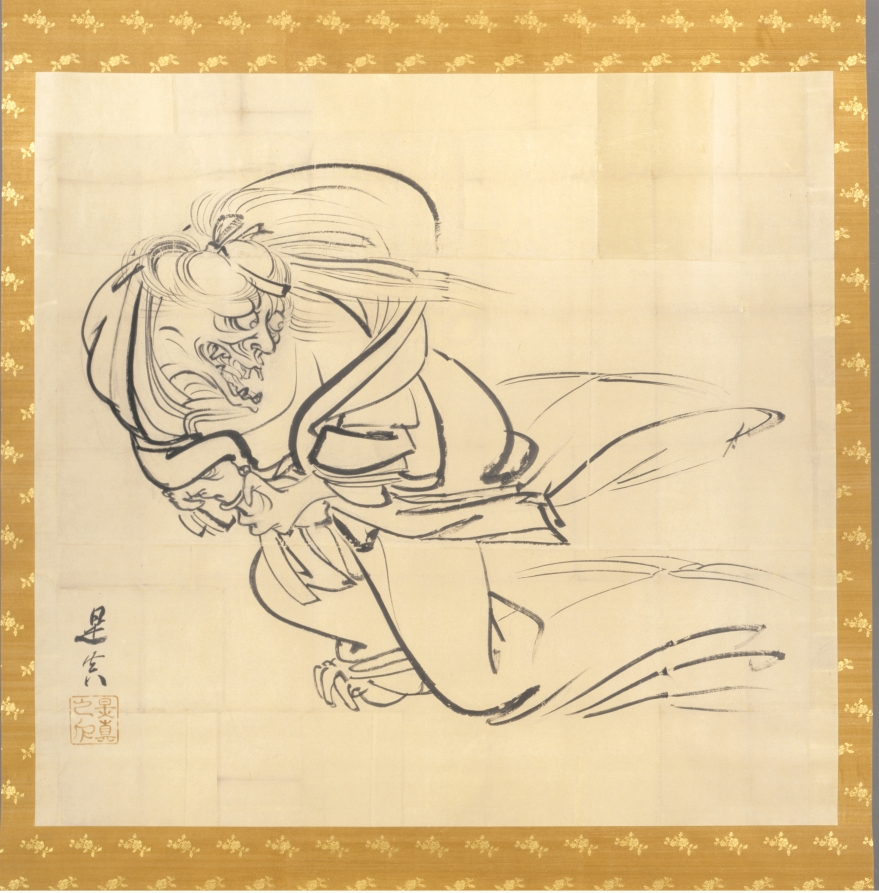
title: Sketch of Ibaraki-dōji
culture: Japan, Edo period (1615–1868)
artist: Shibata Zeshin (Japanese, 1807–1891)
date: c. 1840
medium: hanging scroll, ink on paper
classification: Painting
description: Even before the arrival of US ships demanding trade, Japan’s military government was experiencing economic challenges. This preparatory drawing is for a wooden plaque to be offered to a shrine, beseeching divine intervention in business affairs. Commissioned by a wholesalers’ union, it shows the demon Ibaraki-dōji reclaiming his arm from a warrior who, according to legend, had cut it off. The repossession of the arm is a metaphor for the union’s desire for the restoration of rights to sell sugar, which had been rescinded by the government as part of a misguided effort to stabilize the economy.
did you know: The demon Ibaraki, having disguised itself as the aunt of warrior Minamoto no Yorimitsu to gain access to its severed limb, is shown is in the midst of transforming back into demon form.